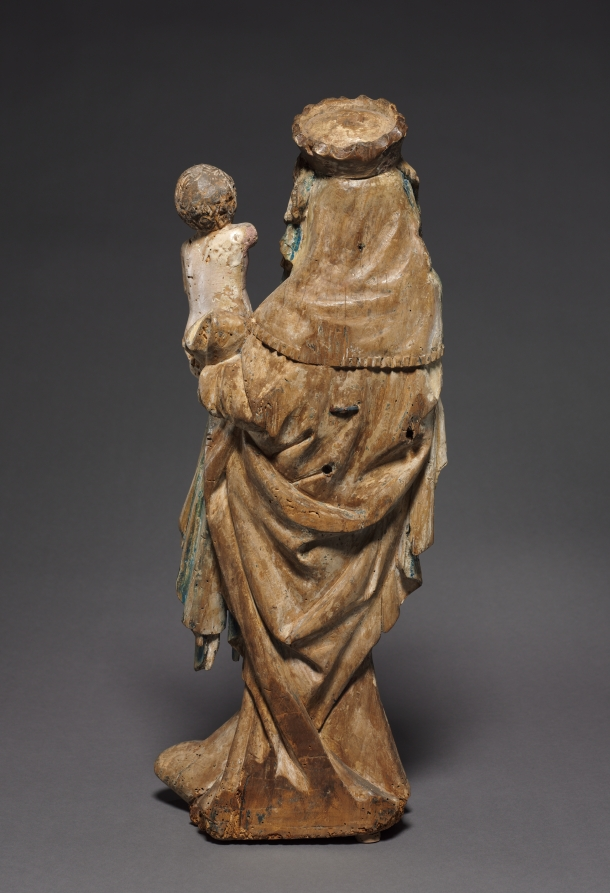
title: Madonna and Child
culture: Bohemia, vicinity of Freistadt, 15th century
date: c. 1400–1410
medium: lindenwood with polychromy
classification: Sculpture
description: This sculpture belongs to a type known as a Schöne Madonna or "Beautiful Virgin," popularized in central Europe during the late 1300s and early 1400s. The Virgin’s stance adheres to an S-curve as she stands with one leg straight and the other slightly bent at the knee. Her body is hidden beneath long, voluminous, draping garments. These so-called Beautiful Madonnas are among the most popular creations of Bohemian art and were in high demand for churches and private veneration.